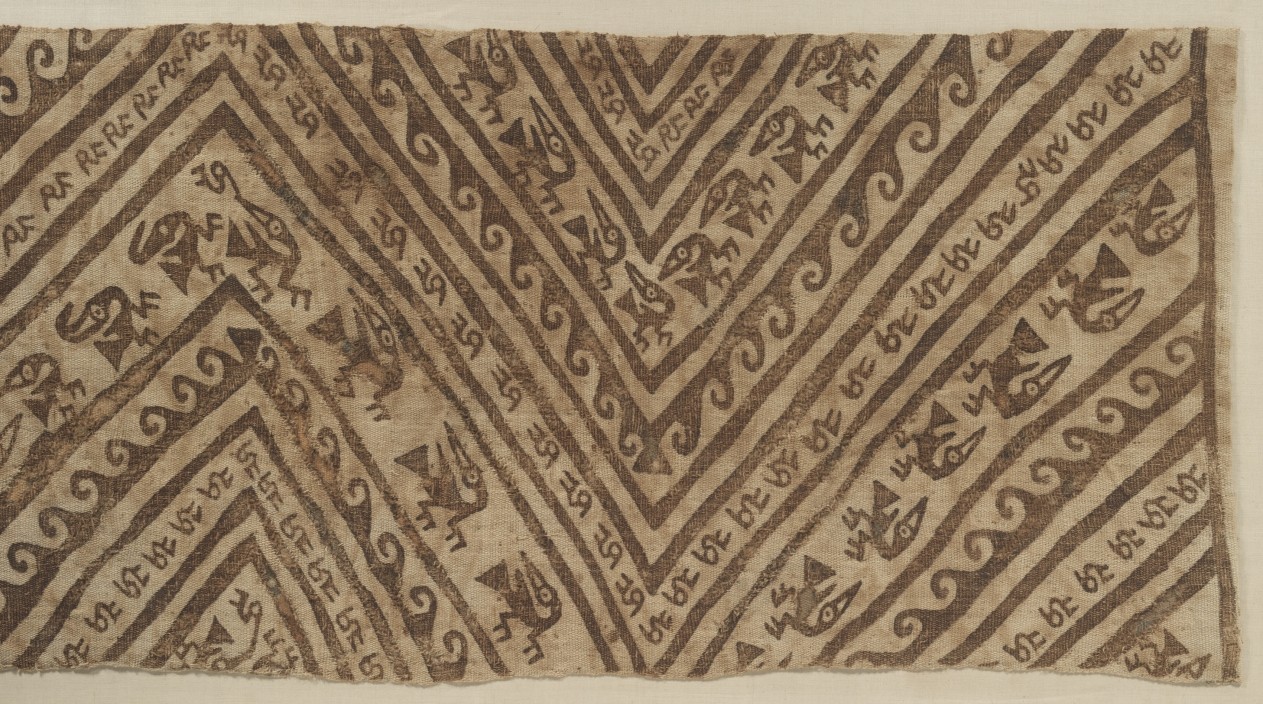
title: Painted Wrapping for Mummy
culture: Peru, Central Coast, Chancay, 12th-15th century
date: c.1100–1400 A.D.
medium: plain cloth, painted; cotton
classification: Textile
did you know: Fine textiles were one of the most prestigious commodities in the ancient Andes.